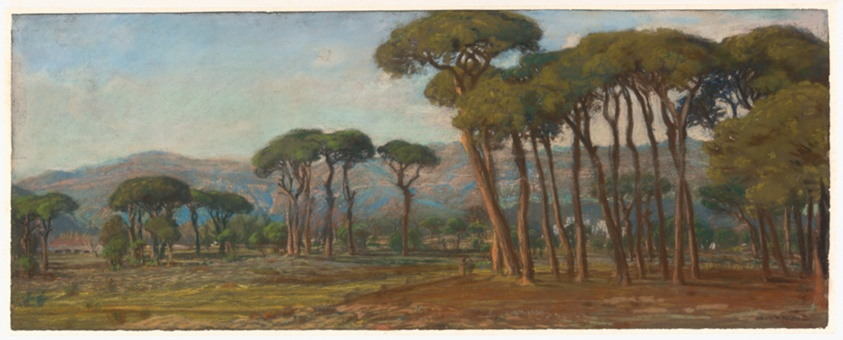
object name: Drawing and Watercolor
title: Extensive Landscape with a Village and Hillside in the Distance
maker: Félix Hippolyte Lanoue (French, 1812-1872)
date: c. 1860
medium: Pastel on blue wove paper, laid down on Japanese paper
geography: France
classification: drawings (visual works); paper; pastel; prints and drawing